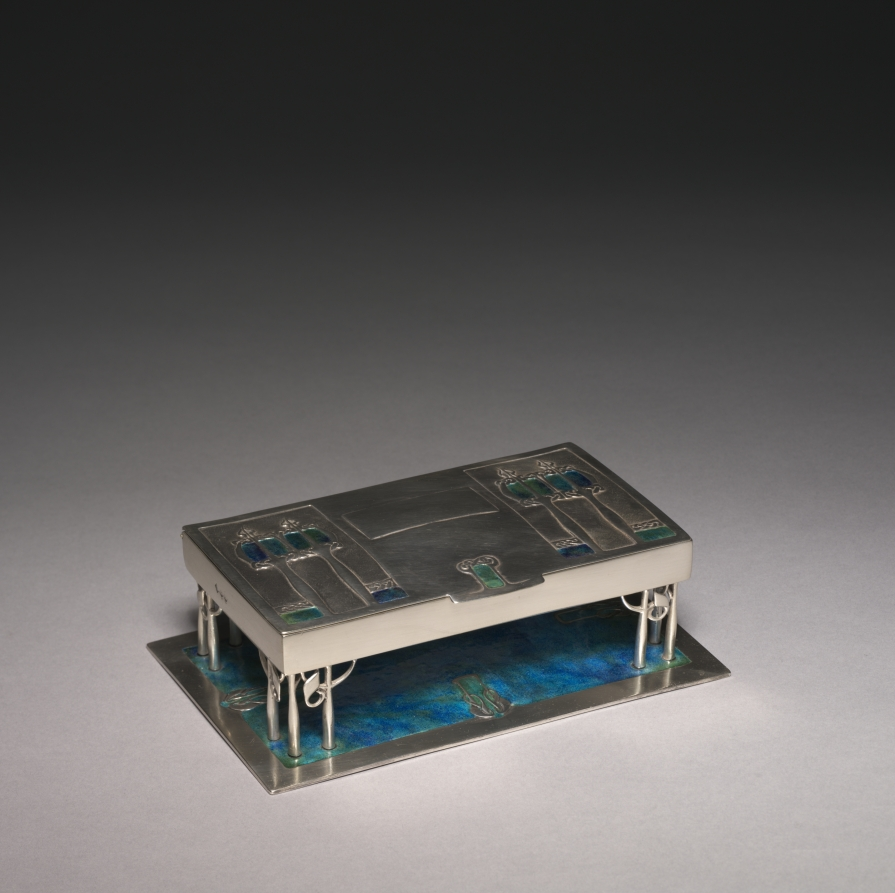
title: Box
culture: England, early 20th century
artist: attributed to Archibald Knox (British, 1864–1933)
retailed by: Liberty and Company (British)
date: c. 1901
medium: silver and enamel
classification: Silver